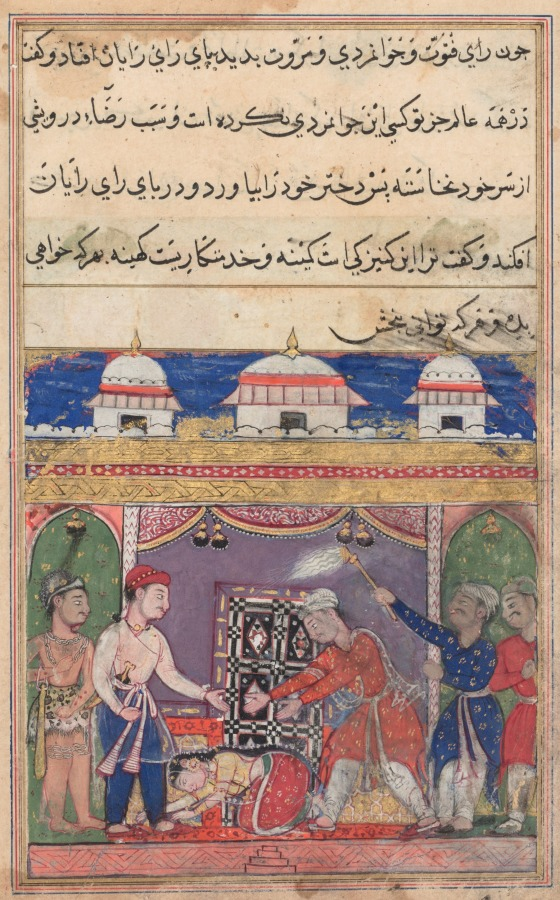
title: The king of Bahilistan offers his daughter to the King of Kings, from a Tuti-nama (Tales of a Parrot): Seventh Night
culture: Mughal India, court of Akbar (reigned 1556–1605)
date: c. 1560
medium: gum tempera, ink, and gold on paper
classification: Painting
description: The local king was so moved by the gesture of the King of King’s in support of the dervish and by his cleverness at bringing his own head, still attached, that he offered his daughter in marriage to him. The princess, wearing Indian dress, is shown honoring his feet. The male figures wear the Central Asian dress of the Mughals, with a long belted tunic and pants. The King of Kings then allowed her to marry the dervish. A fancy door with geometric patterns is in the background, but it extends all the way down to the front of the floor, which has been tilted up, so that the tile pattern can be seen head-on. These fanciful manipulations of space are a hallmark of local Indian artistic practice.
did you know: The domed pavilions are typical features of Mughal architecture, with the pink sandstone eves.